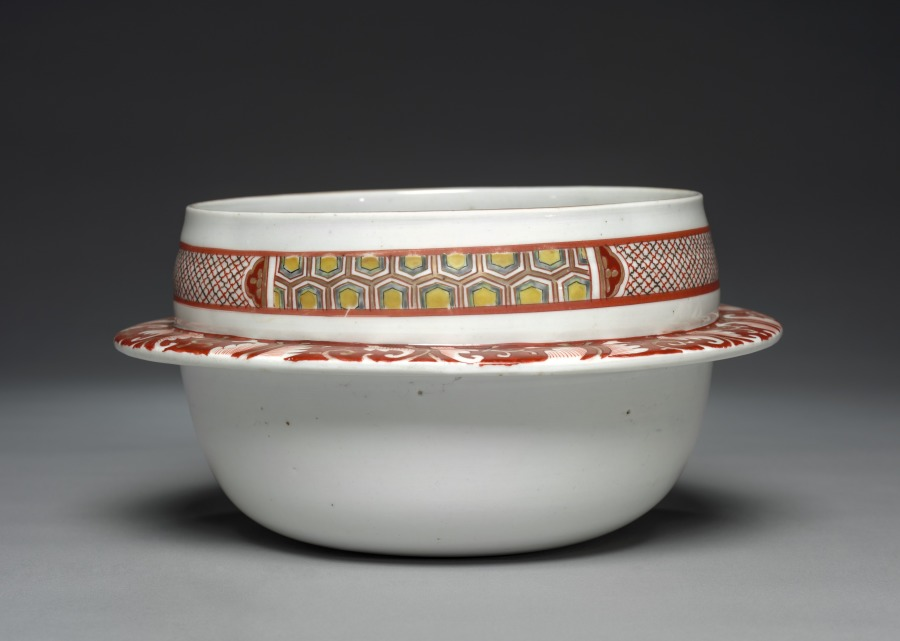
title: Rice Container: Ko Imari Type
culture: Japan, Edo period (1615–1868)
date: late 1600s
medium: porcelain with overglaze enamel and gold decoration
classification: Ceramic